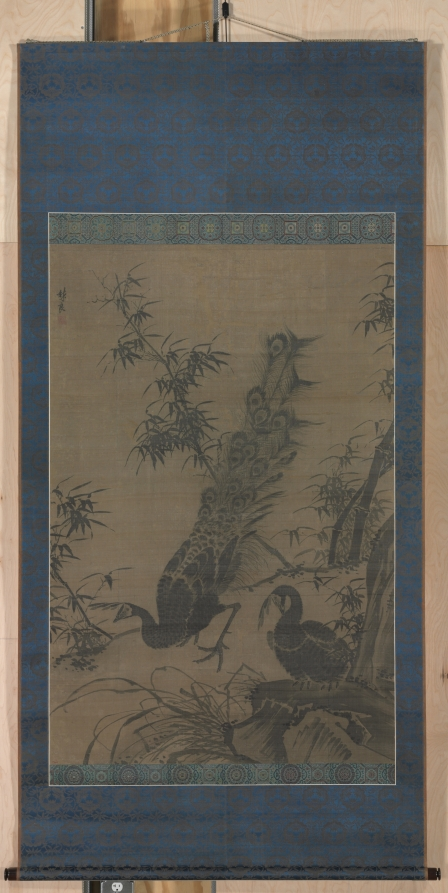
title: A Pair of Peafowl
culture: China, Ming dynasty (1368–1644)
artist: Lin Liang (Chinese, 1416–1480)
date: late 1400s-early 1500s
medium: hanging scroll, ink on silk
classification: Painting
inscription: 林良. [印] 以善圖書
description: The peacock, identified by the flamboyant tail, is paired with a female peahen to its right. In lowering her head, the hen seems to show respect to the male peacock. With his articulate brushstrokes and strong contrasting tones, Lin Liang’s representation in black ink appears as vivid as Yin Hong’s colorful peacock (1974.31). The painter skillfully uses wet and dry ink as well as broad and thin washes to represent the plumage of the bird. The surface of the rocks, depicted in powerful sweeping strokes, recalls the landscape painting style of the Zhe School, which specialized in expressive brushwork.